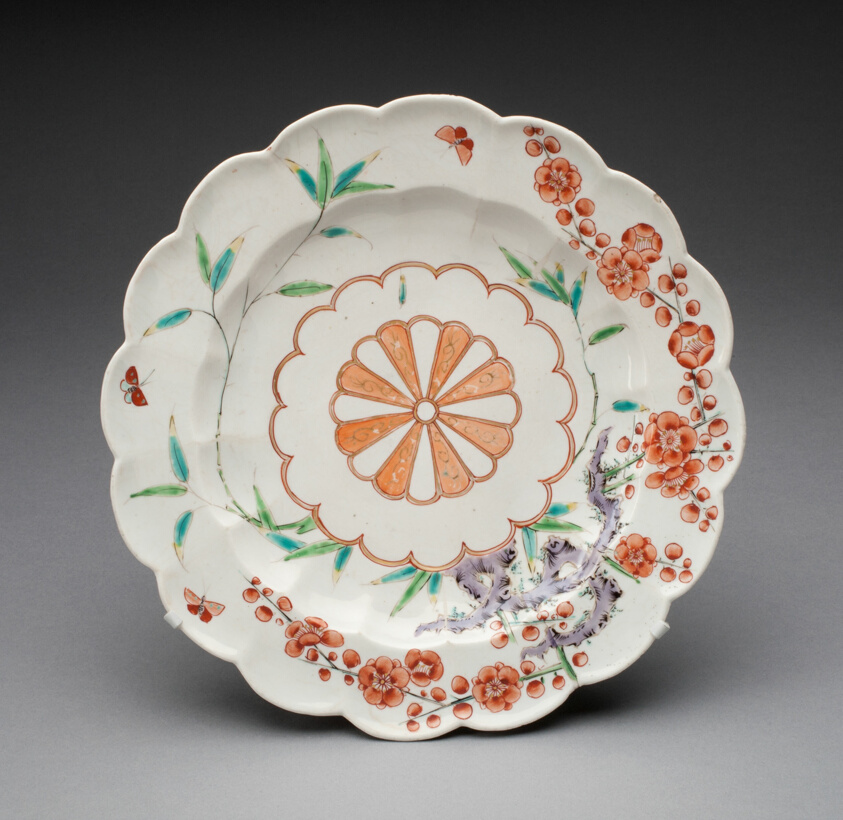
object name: Ceramics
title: Plate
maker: Chelsea Porcelain Manufactory; London, England, c. 1745-1784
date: c. 1755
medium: Soft-paste porcelain, polychrome enamels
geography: Chelsea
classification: plate (general, dish); dish (vessel); ceramics; porcelain; european decorative arts